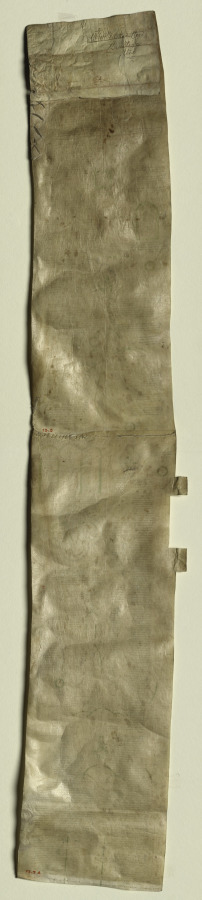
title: Peter of Poitiers's "Compendium Historiae in Genealogia Christi"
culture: England, Canterbury, 13th century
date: c. 1220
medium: ink and tempera on a vellum roll of four membranes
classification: Manuscript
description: This manuscript roll, composed of four membranes formerly stitched together in a continuous roll about nine feet long, has been divided in the middle for easier visibility and study. The text is an abridgment of biblical history focused on the descent of Christ from Adam. It was written by Peter of Poitiers (about 1130–1205), who taught theology and history in Paris and was widely copied. The present roll is an English copy of Peter's text made shortly after his death. Although manuscript rolls were hung on the walls of a classroom as instructional aids to students, some of them have value beyond their textual and historical interest because of the fine quality of their drawings, as seen here. A comparison with Canterbury manuscripts and stained glass of around 1220 is the basis for the attribution to Canterbury. Peter of Poitiers's aim in this project was to assist students prevented from mastering biblical history because of its length and because they were too poor to own books. His text on roll is the briefest possible summary of biblical history. It is arranged in six historical stages, denoting the six ages of the world, as decreed by theological tradition. The first five ages were inaugurated by Old Testament individuals: Adam, Noah, Abraham, David, and Sedecias. The birth of Christ heralded the sixth stage. Beginning at the top of the first membrane, the text consists of brief biographical entries on the ancestors of Christ (Adam, Noah, Abraham, Moses, and David) and other biblical personalities. These extend to the birth of Christ on the fourth membrane, ending with accounts of Hebrew and Roman kings and the Apostles. Each compendium shows the names of the ancestors inscribed within circles, those of direct descent placed vertically in a central column, others scattered in clusters to the right and left. The decoration of the roll consists of a series of medallions of diverse geometrical frames filled with either a figural drawing or a diagram. The style of these pen-and-ink drawings, some illuminated in tempera or tinted with wash, stems from English manuscript and glass painting attributed to the school of Canterbury Cathedral. The style of the museum's illustrations is so close to the stained glass panels made for Trinity Chapel at Canterbury (about 1220) to suggest that an artist active as a glazier in the Cathedral workshop may also have executed the manuscript. In the least, the painter of the roll manuscript was familiar with the style of the painted glass, and on this basis, a date of about 1220 seems appropriate. Additional evidence is supplied by a psalter illuminated at Canterbury shortly before 1220. The figurative scenes in this psalter were apparently illustrated by the same hand that executed the line and wash drawings in the museum's roll.